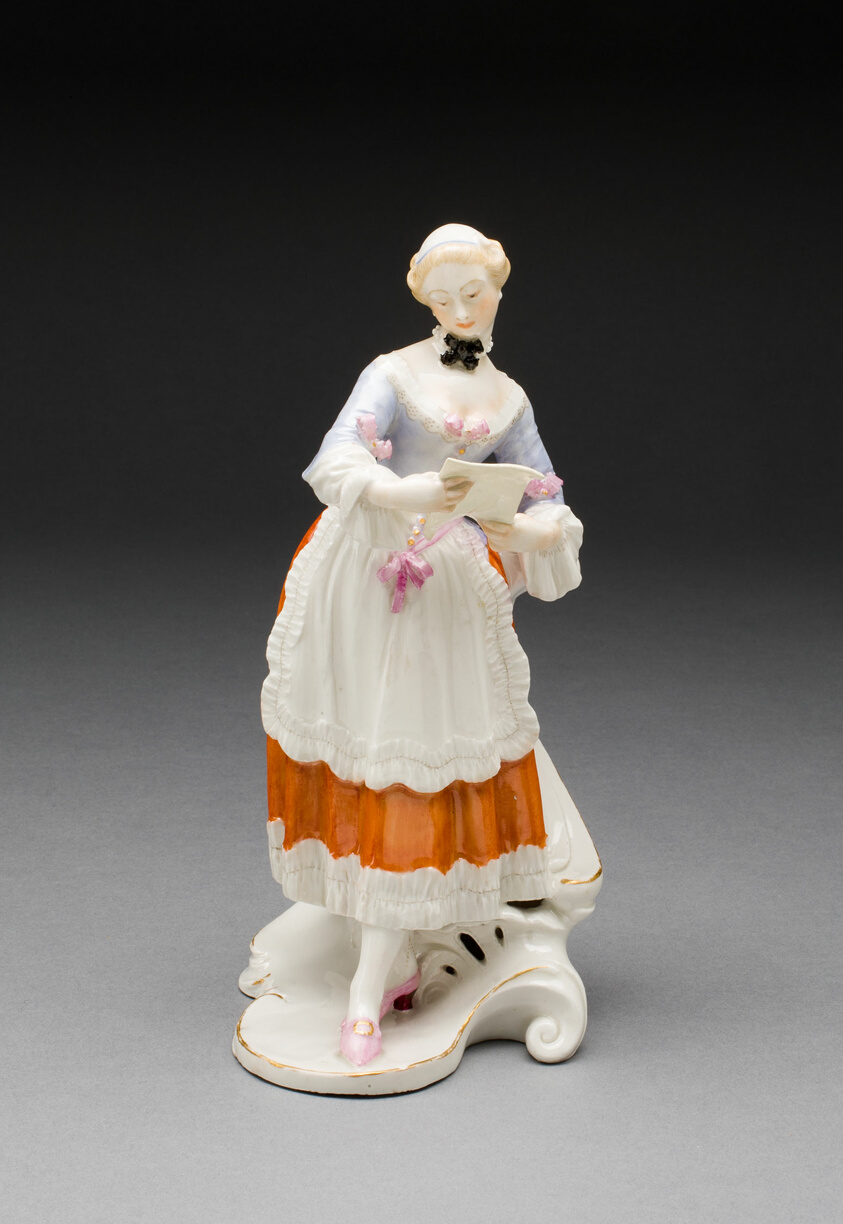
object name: Ceramics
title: Figure of a Woman Reading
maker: Franz Anton Bustelli (German, 1723-1763, b. Switzerland)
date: c. 1765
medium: Hard-paste porcelain with polychrome enamel decoration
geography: Germany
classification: sculpture; porcelain; european decorative arts; ceramics